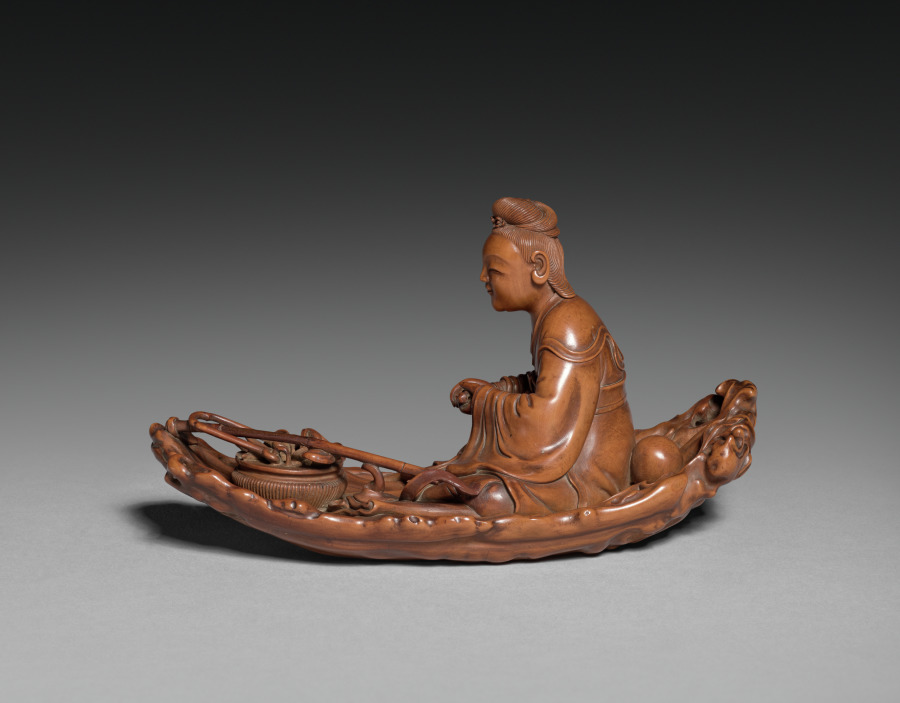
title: Figure of Daoist Immortal He Xiangu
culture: China, Qing dynasty (1644-1911)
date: 1700s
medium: Boxwood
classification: Wood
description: He Xiangu is one of the Eight Immortals in the Daoist pantheon. She was thought to have been a real person who lived in the Tang dynasty, originally named He Qiong. As a teenager, she was instructed in a dream to eat powdered mica to become immune from death and to vow to remain unmarried. She did so and became an enlightened practitioner of Daoism. In this delicate carving, He Xiangu is placidly seated in a gnarled and knotty wooden raft amid green-tinted ivory waves. In front of her rests a bamboo basket filled with objects associated with Daoist immortality, and she holds a branch of lingzhi fungus like an oar.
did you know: The lingzhi she holds is a woody mushroom often used in traditional Chinese medicine and associated with immortality.